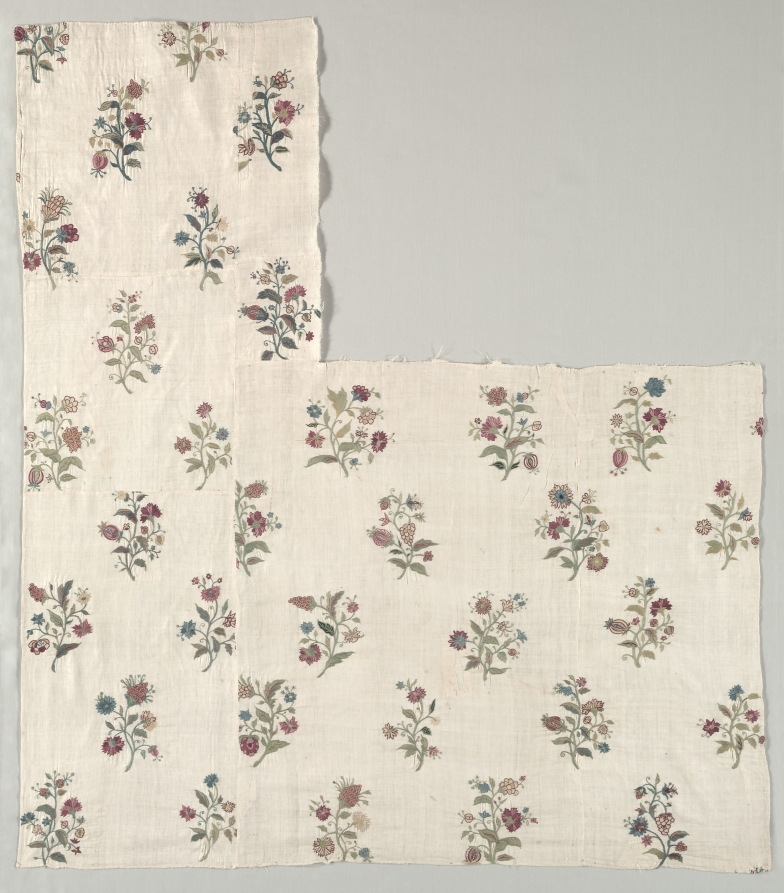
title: Embroidered Cover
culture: France, 18th century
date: 1700s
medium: embroidery, silk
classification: Embroidery